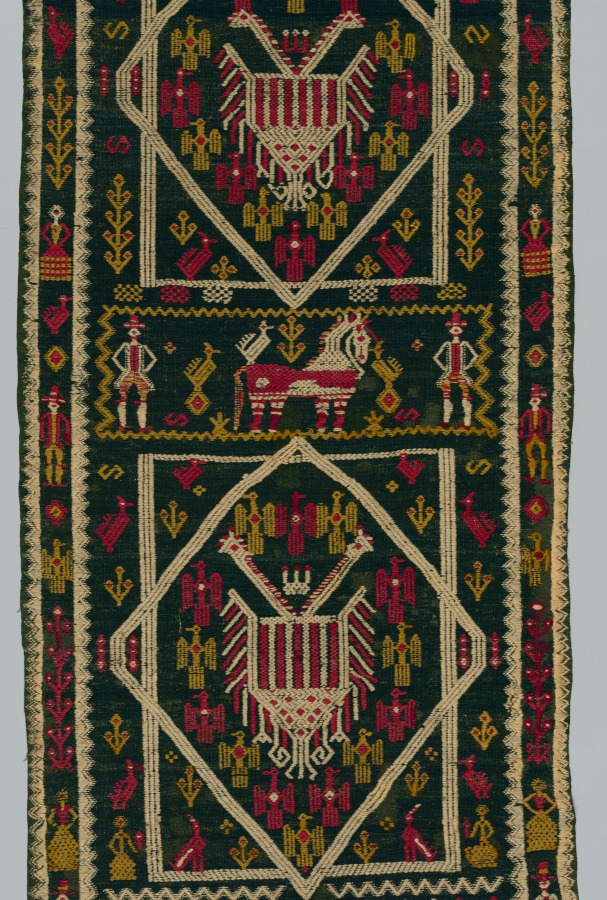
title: Woven Bed or Chest Cover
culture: Italy, Terra di Lavoro, 18th century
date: 1700s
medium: embroidery; wool on linen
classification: Textile